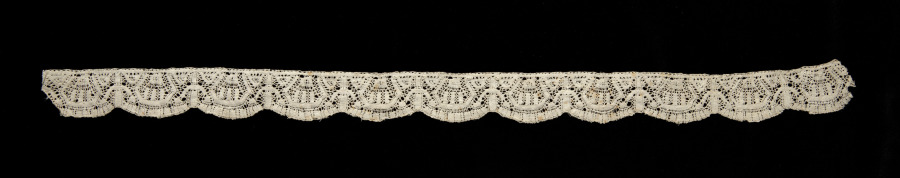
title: Lace Edging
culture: Italy, Abruzzi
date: 1600s–1700s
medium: Bobbin lace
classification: Lace